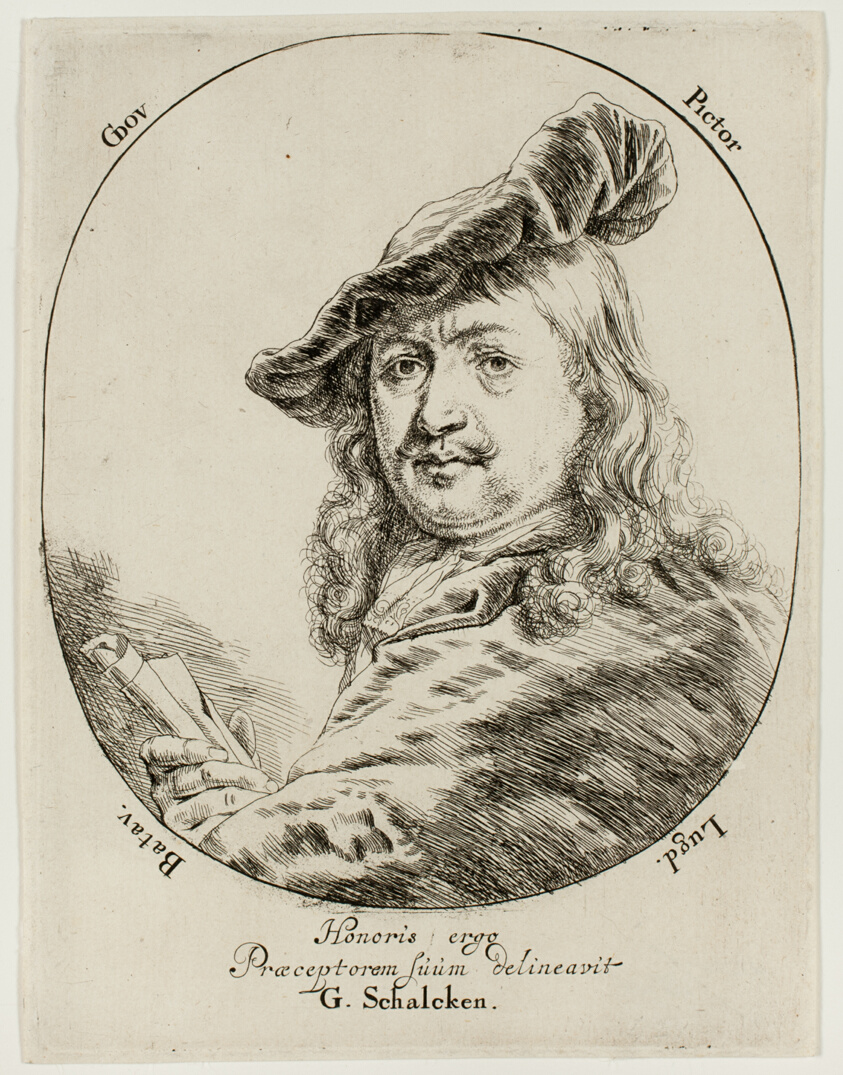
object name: Print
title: Portrait of Gerard Dou, the Painter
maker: Godfried Schalcken; Dutch, 1643-1706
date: 1660/80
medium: Etching in black on ivory laid paper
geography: Holland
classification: etching; print; prints and drawing